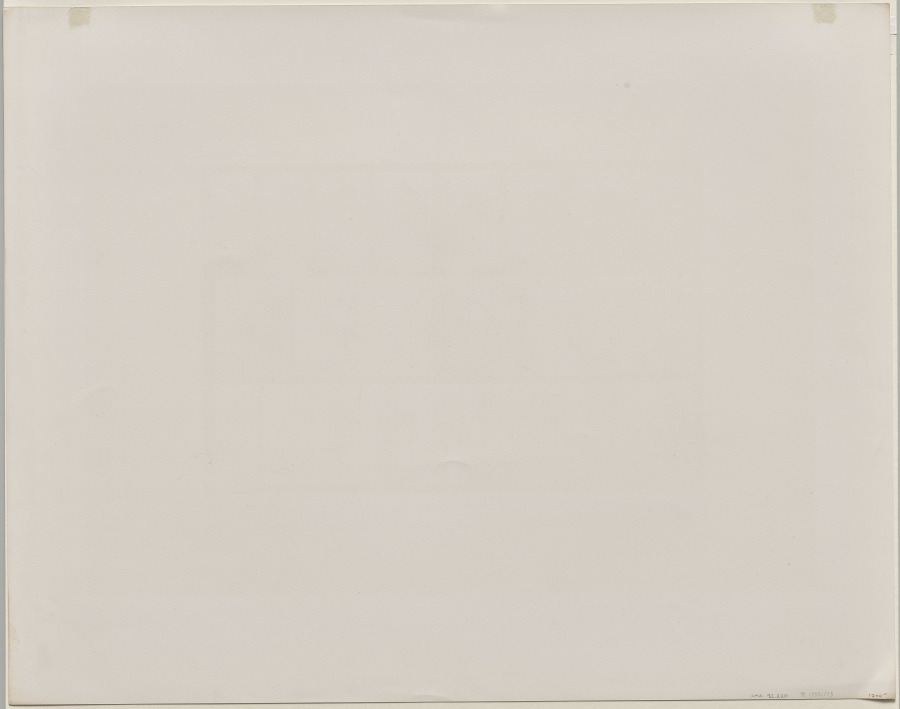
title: Emptying a Bucket of Water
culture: America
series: Animal Locomotion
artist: Eadweard J. Muybridge (American, 1830–1904)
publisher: University of Pennsylvania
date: 1887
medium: collotype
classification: Photograph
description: Eadweard J. Muybridge initially used horses to capture motion as separate slices of time faster than the human eye could perceive them, then moved on to study other animal and human movements. Everyday activities, like emptying a bucket of water, were broken down and sequenced back-to-back. This series was commissioned by the University of Pennsylvania and intended to diagnose dysfunction in human movement by allowing each consecutive action to be studied in isolation. The university’s desire for distribution called for the use of collotype. The process had been recently improved to the point where editions of up to 1,000 were possible, making it an attractive option for publishers.